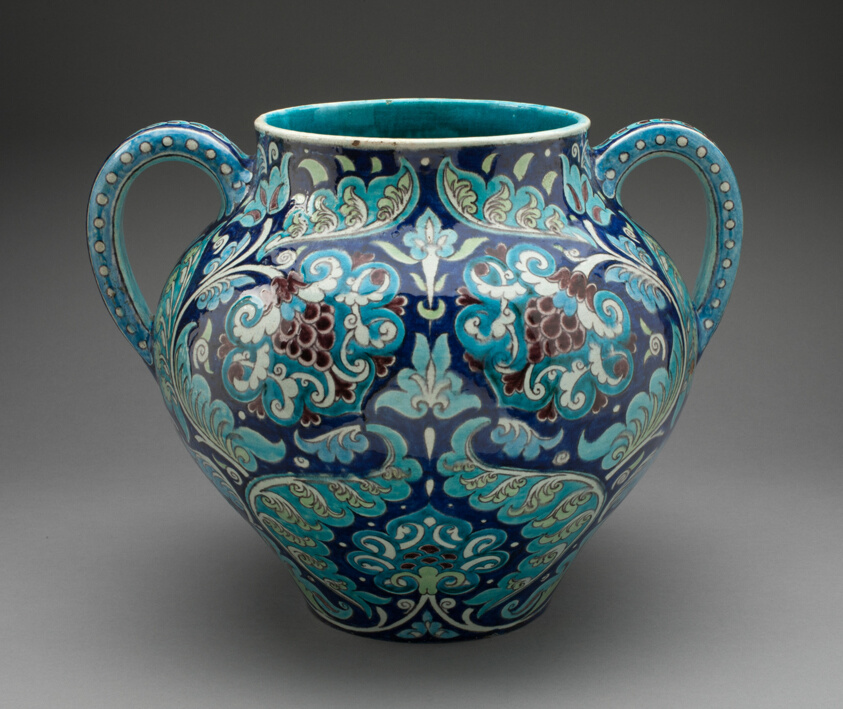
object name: Ceramics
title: Vase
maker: William de Morgan & Co.; English, founded 1869; Decorated by Fred Passenger; English, 1864-1935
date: c. 1885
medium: Tin-glazed earthenware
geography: England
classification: vase; earthenware; vessel; european decorative arts; ceramics